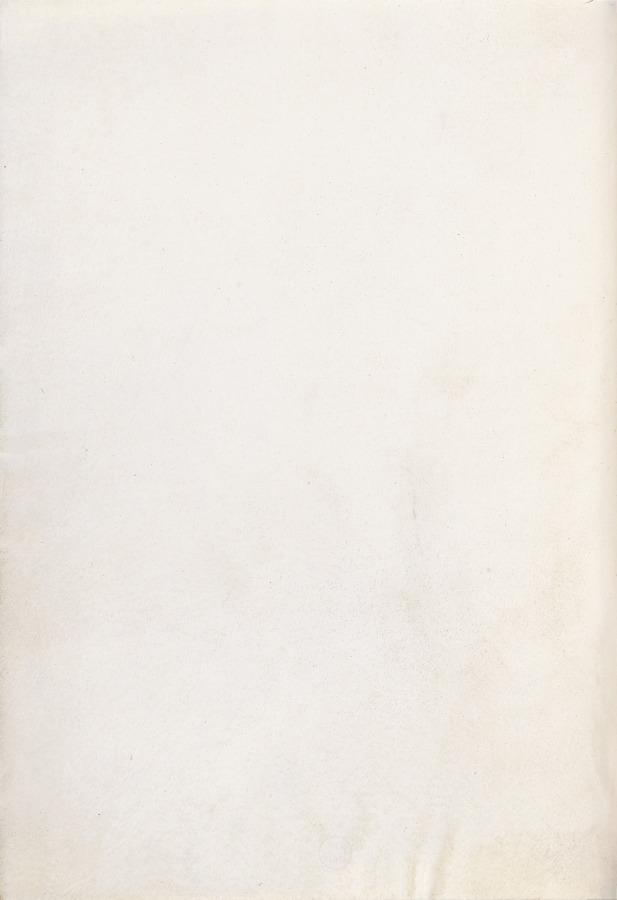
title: Hours of Queen Isabella the Catholic, Queen of Spain: Fol. 1r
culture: Flanders, Ghent and Bruges, late 15th century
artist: Master of the First Prayerbook of Maximillian (Flemish, c. 1444–1519)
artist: and Associates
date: c. 1500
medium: ink, tempera, and gold on vellum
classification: Bound Volume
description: This manuscript was illuminated by a circle of at least five highly organized manuscript painters active in the Flemish cities of Ghent and Bruges. The principal illuminator was Alexander Bening, who painted the majority of the book's miniatures. Manuscripts produced by this circle of artists are renowned for the decoration of their borders, which typically feature a rich variety of realistically painted flowers, birds, and butterflies. This prayer book, called a book of hours, was intended not for a cleric but for the private devotions of a lay person—in this case, Isabella the Catholic, Queen of Spain (1451–1504); her coat of arms embellishes the book's frontispiece. It is unlikely that the book was commissioned by the Queen herself; rather, she probably received it as a diplomatic gift from someone courting her patronage, perhaps Cardinal Francisco Jimenez de Cisneros. A Franciscan friar, Jimenez was dependent upon Isabella for his advancement, first to the post of Queen's confessor in 1492, and then to Archbishop of Toledo in 1495.